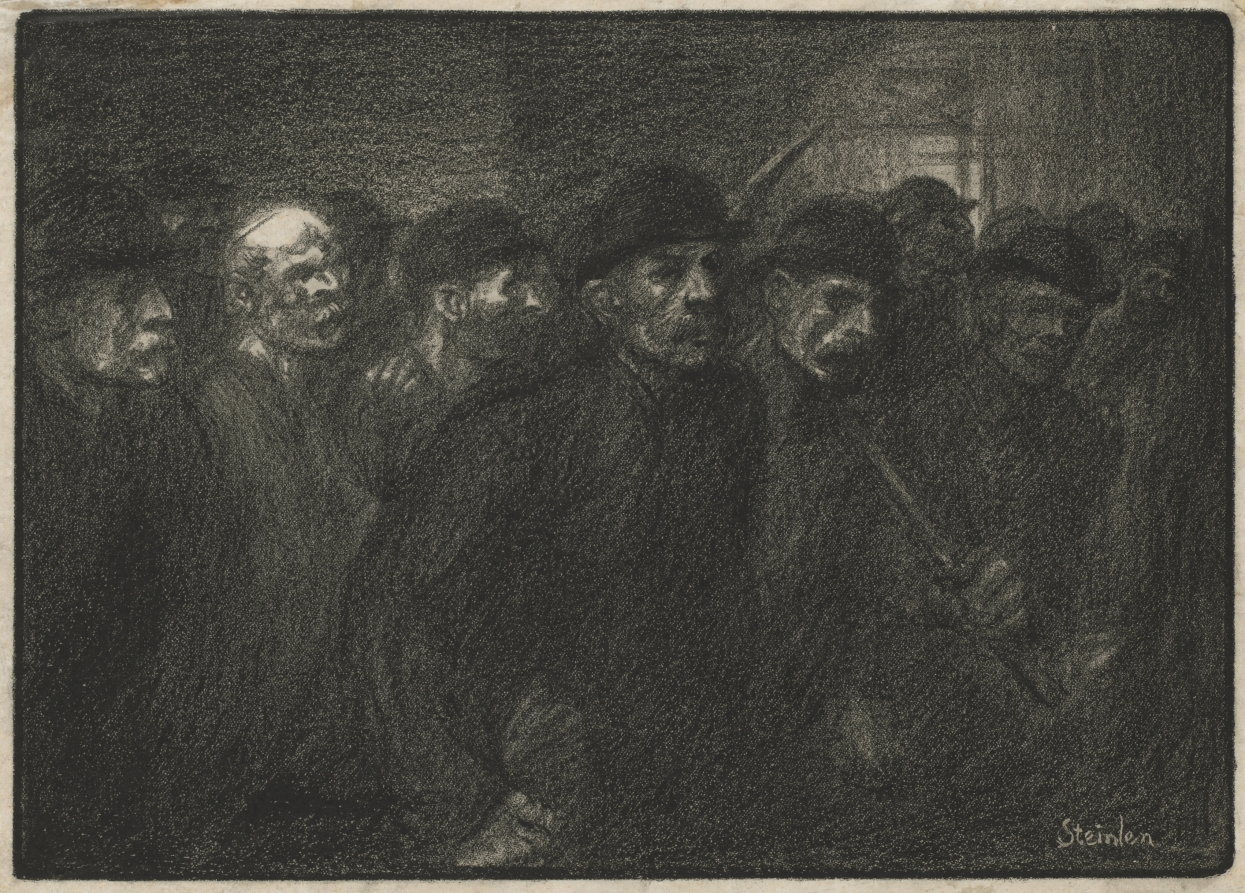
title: Ouvriers Sortant de L'Usine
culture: Switzerland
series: published in "L'art d'Ajourd'hui"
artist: Théophile Alexandre Steinlen (Swiss, 1859–1923)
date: 1903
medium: lithograph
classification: Print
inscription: signed lower right in stone: Steinlen